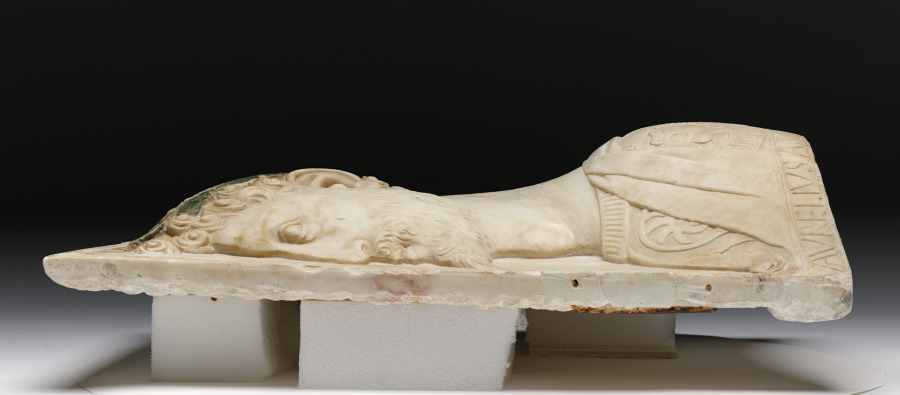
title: Aurelius Antoninus Pius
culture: Italy, Lombard School, late 15th century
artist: Gregorio di Lorenzo (Italian, c. 1436–1504)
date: late 1400s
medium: marble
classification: Sculpture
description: A laurel wreath rests on this Roman emperor’s finely articulated corkscrew curls, underscoring his military triumphs. While many ancient and classically inspired marble sculptures were painted, the survival of pigments is rare. In addition to the vibrant green coloring, traces of gold also remain on the leaves.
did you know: The artist can be identified by his distinctive flame-shaped curls forming the beard.